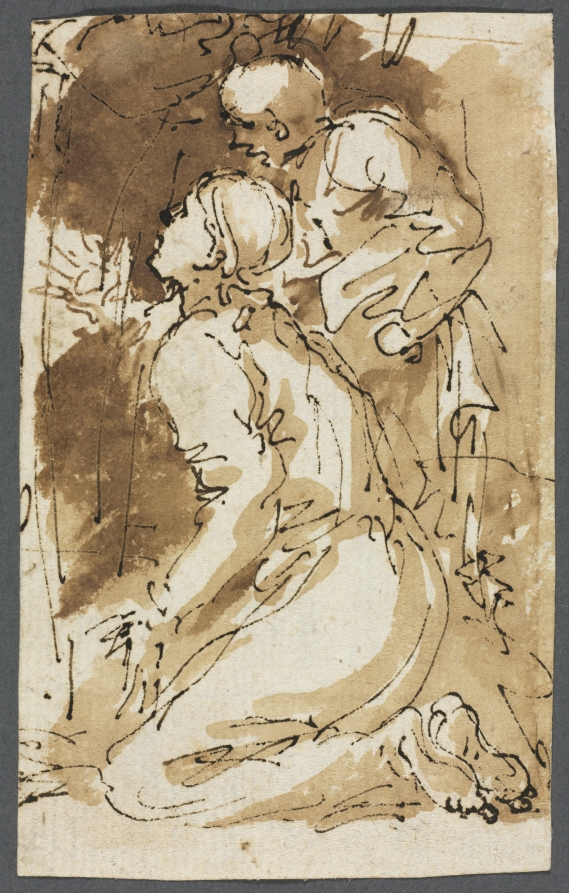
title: Figure Studies (recto)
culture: Italy, 17th century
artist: Salvator Rosa (Italian, 1615–1673)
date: c. 1640–1649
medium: pen and brown ink and wash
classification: Drawing